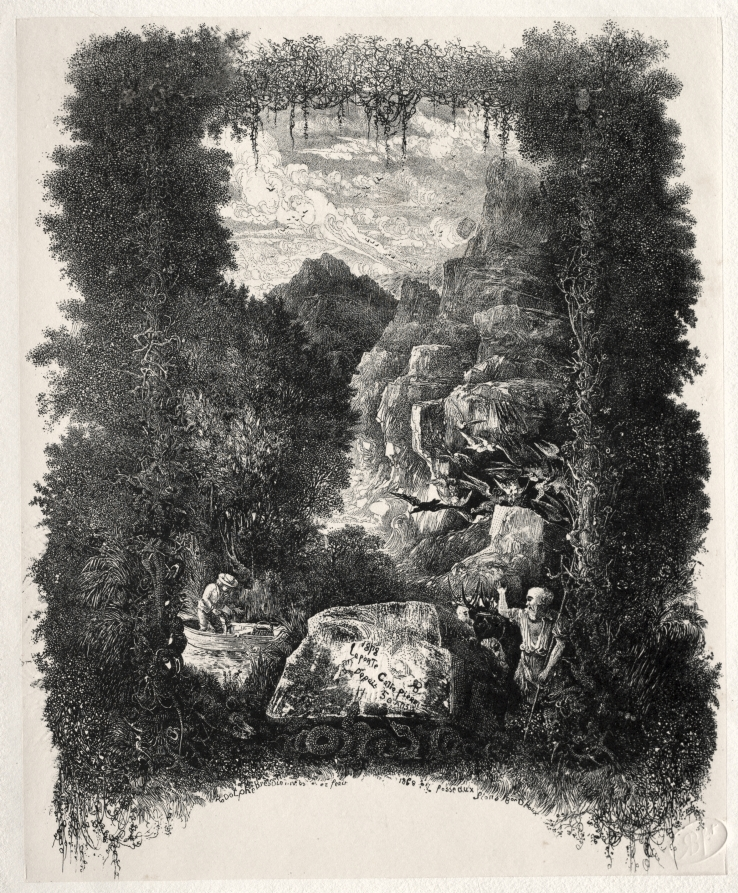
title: First frontispiece for Fables and Fairy-Tales by Thierry-Faletans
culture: France, 19th century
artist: Rodolphe Bresdin (French, 1822–1885)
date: 1868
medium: lithograph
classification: Print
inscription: lower left, in stone: Rodolphe Bresdin inv.; lower right, in stone: 1868 fosse aux lions Bordeaux